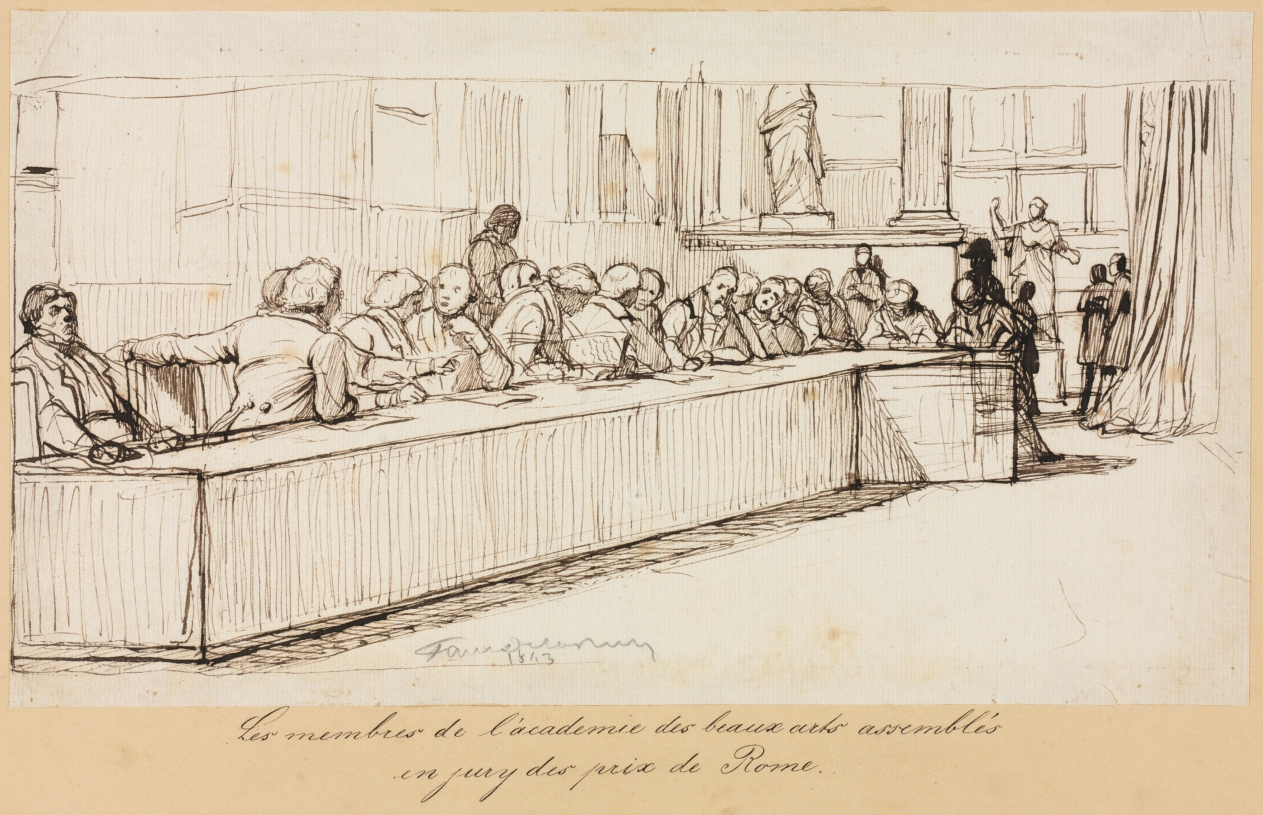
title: The Members of the Academy of Beaux-Arts Assembled to Jury the Rome Prize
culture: France, 19th century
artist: Paul Delaroche (French, 1797–1856)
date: 1841 or 1842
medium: pen and brown ink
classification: Drawing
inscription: lower center, in graphite: PaulDelaroche / 1843; secondary support, left center, in graphite: Ingres-=; lower center, in black ink: Les membres de l'academie des beaux arts assemblés / en jury des prix de Rome.; lower right, in black ink: Paul De la Roche.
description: This sketch records a meeting of the jury of the Rome Prize, an annual award for promising students given by the French Royal Academy of Painting and Sculpture. The prize included a scholarship for several years of study in Rome amid treasures of ancient and Renaissance art. The Rome Prize long represented the first important step toward developing a solid official career as a painter in France. Although most of the men sketched here are unrecognizable, the one closest to the left appears to be the painter Jean-Auguste-Dominique Ingres (1780-1867). The identification allows us to correct the date of 1843 inscribed at the bottom of the drawing, for we know that Ingres did not participate as a jury member in 1843. Instead the sketch must date to 1841 or 1842.